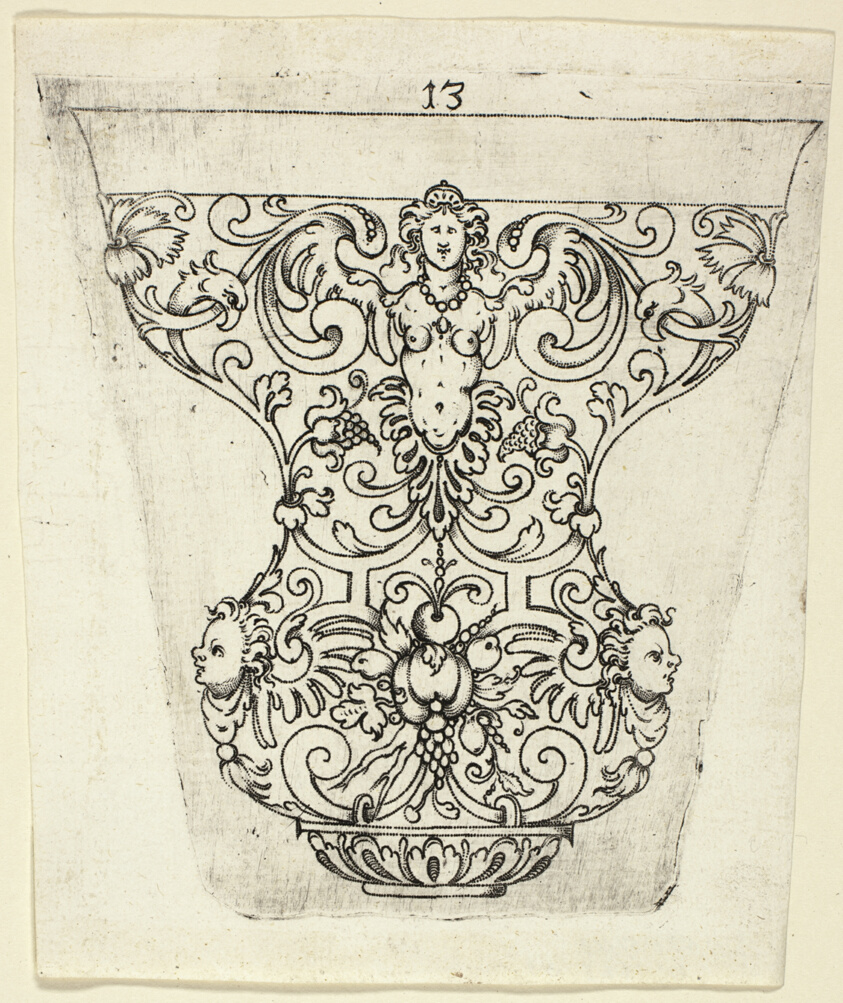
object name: Print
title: Plate 13, from twenty ornamental designs for goblets and beakers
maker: Master A.P. (German, active early 17th century)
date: 1604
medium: Punch engraving in black on ivory laid paper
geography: Germany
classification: engraving; print; prints and drawing